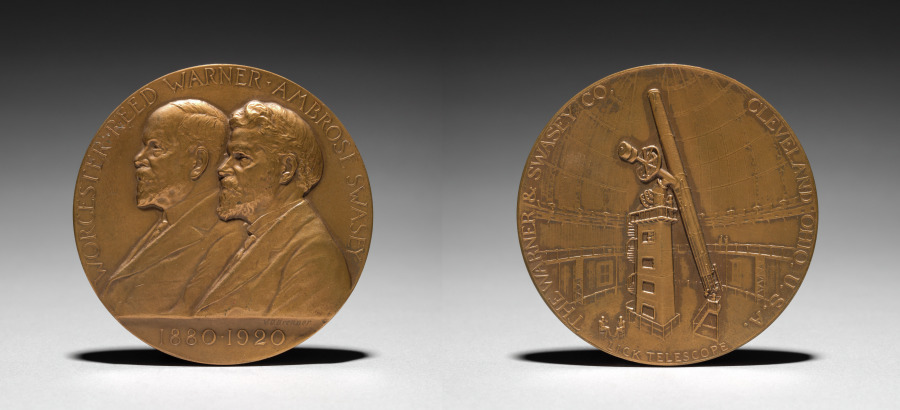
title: Medal Commemorating the 40th Anniversary of the Warner and Swasey Company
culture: America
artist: Victor D. Brenner (American, 1871–1924)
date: 1920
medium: bronze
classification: Metalwork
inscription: "Worcester Reed Warner. Ambrose Swasey, 1880-1920."